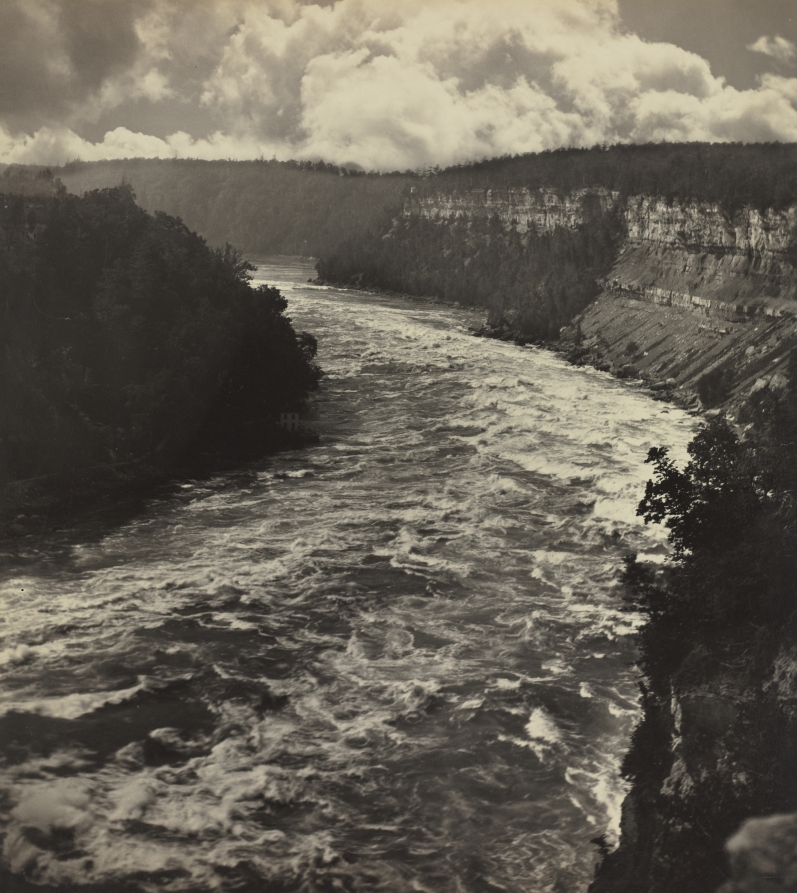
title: Niagara, Rapids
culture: America or Canada, 19th century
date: c. 1880s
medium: albumen print from glass negative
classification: Photograph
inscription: Written in red ink on recto of mount: "Niagara, Rapids"